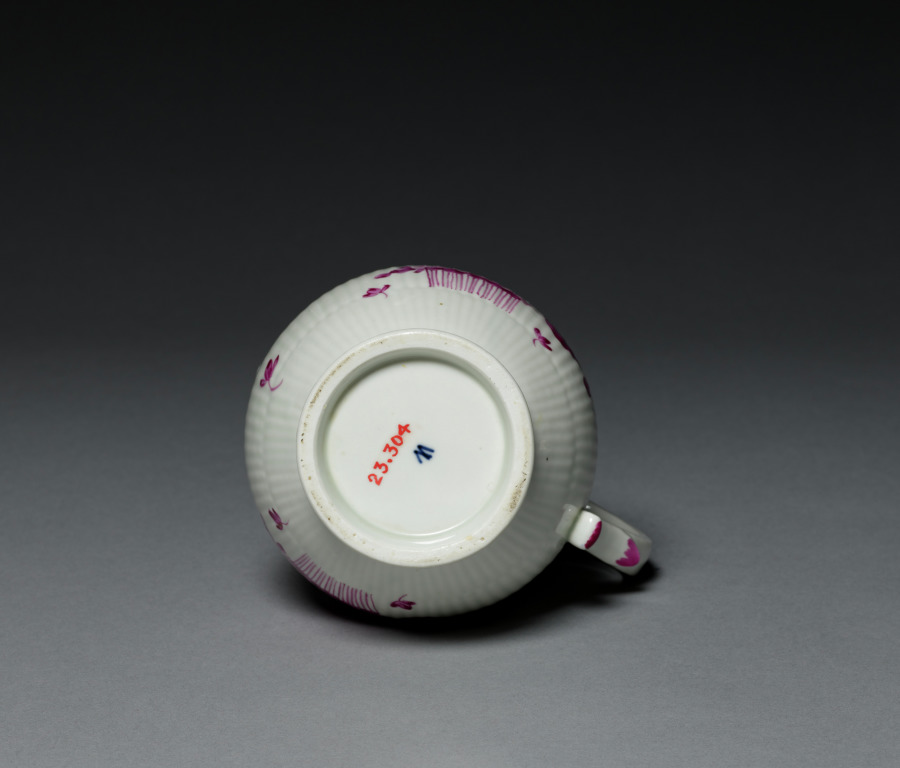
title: Chocolate Pot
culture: Germany, Berlin, late 18th century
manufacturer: Royal Porcelain Manufactory, Berlin (German)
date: late 1700s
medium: porcelain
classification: Ceramic